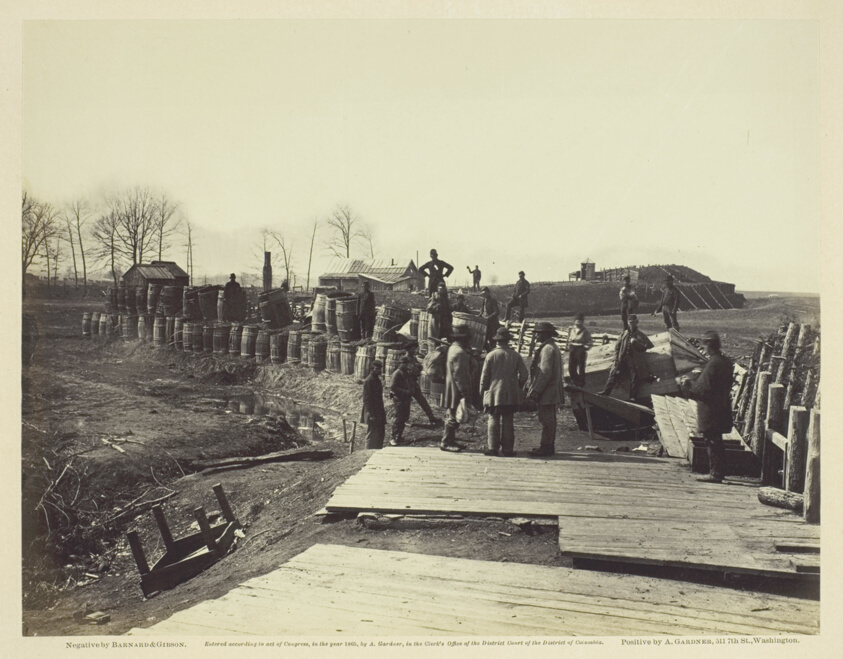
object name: Photograph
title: Fortifications at Manassas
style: 19th century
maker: Barnard and Gibson (American, active 19th century)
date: March 1862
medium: Albumen print, pl. 11 from the album "Gardner's Photographic Sketch Book of the War, vol. 1" (1866)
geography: United States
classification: photograph; albumen silver print; photography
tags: Collected by Hugh Edwards, Gardner's Photographic Sketch Book